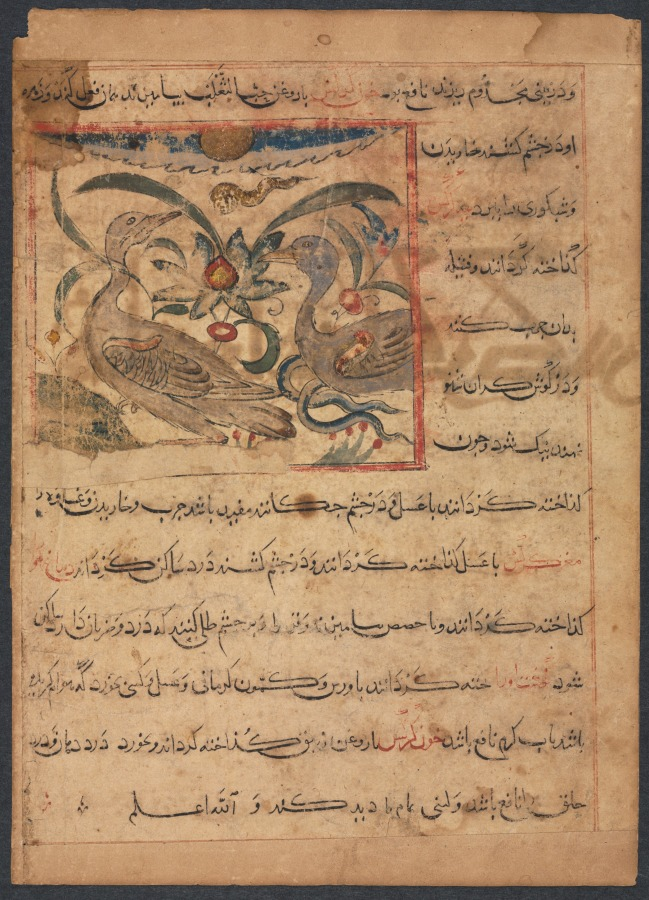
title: "Benefits of the Parts of Vultures" (From the Manafi' al-Haywan of Abu Sai'd Ubayd-Allay Ibn Bakhtishu) (verso)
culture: Iran, Marageh, Mongol Period (Ilkhanid), late 13th Century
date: late 1200s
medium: opaque watercolor, ink and gold on paper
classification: Manuscript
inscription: Script: Naskh